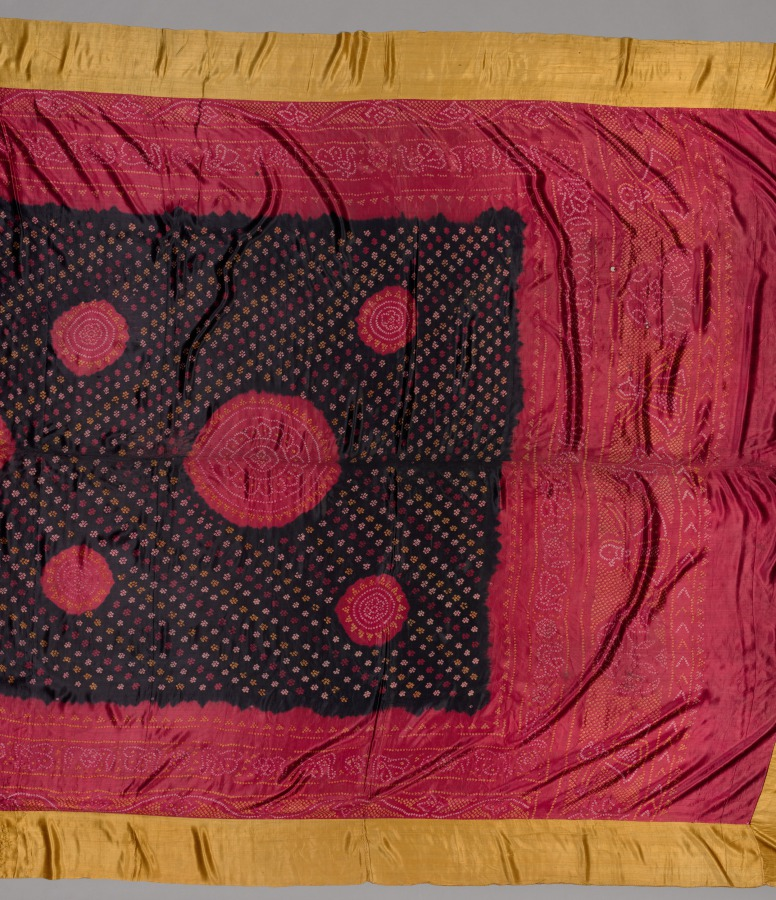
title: Indian Textile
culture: India, 19th - early 20th century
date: 1800s - early 1900s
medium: satin, tied and dyed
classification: Textile